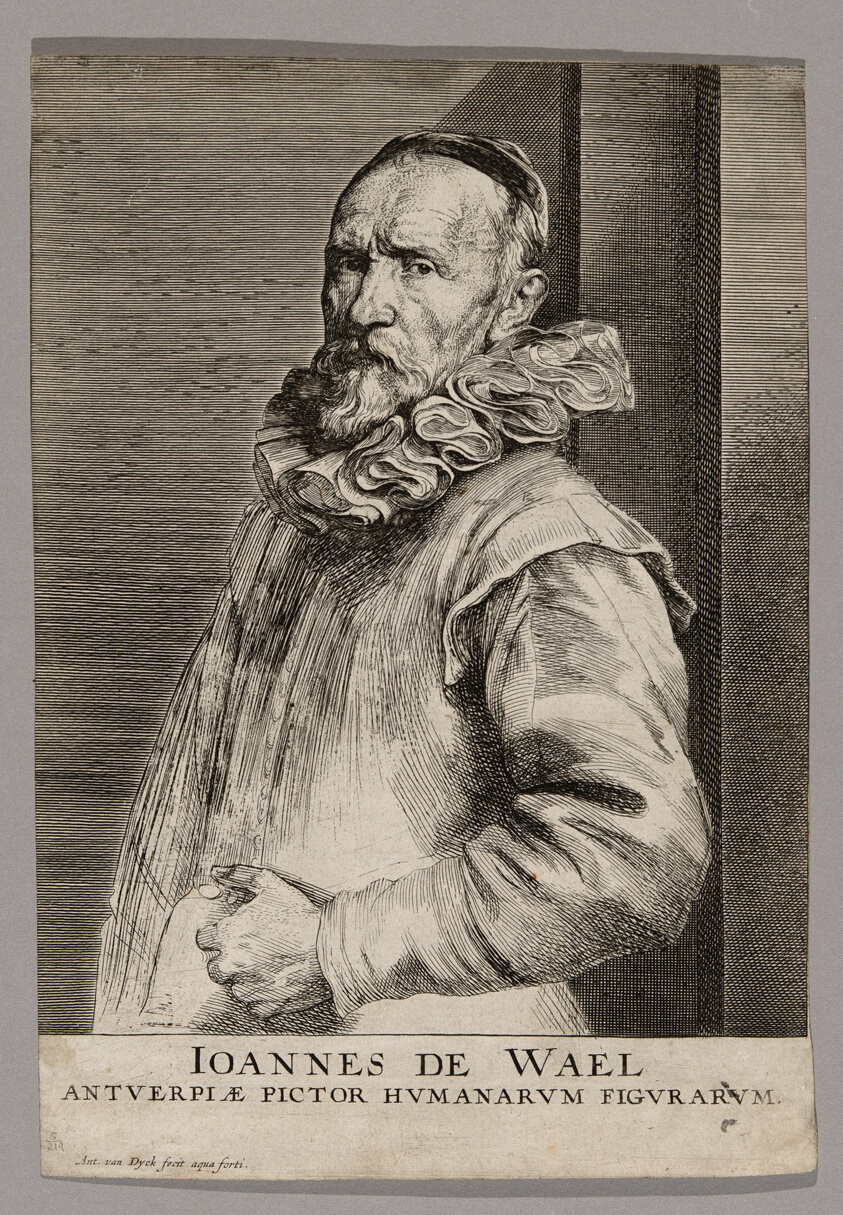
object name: Print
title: Jan de Wael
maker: Anthony van Dyck (Flemish, 1599-1641)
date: 1630/33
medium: Etching and engraving in black on ivory laid paper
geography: Flanders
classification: etching; print; prints and drawing